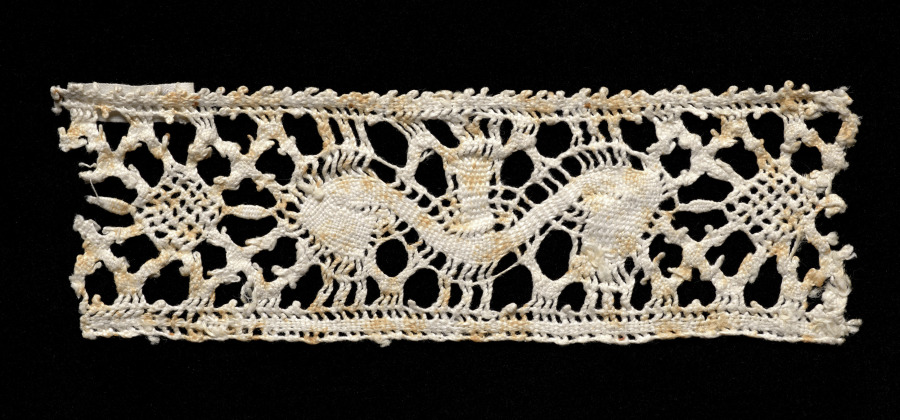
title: Lace Insertion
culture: Italy, Abruzzi, Gessopalena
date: 1700s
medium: Bobbin lace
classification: Lace